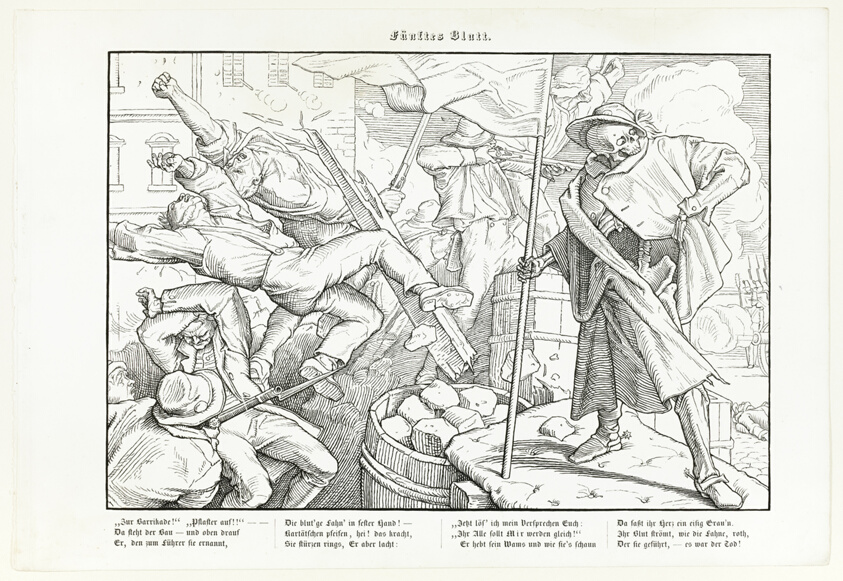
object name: Print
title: Auch ein Todtentanz, plate V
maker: Alfred Rethel (German, 1816-1859)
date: 1848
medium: Wood engraving in black on ivory wove paper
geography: Germany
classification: woodcut; book; prints and drawing; print